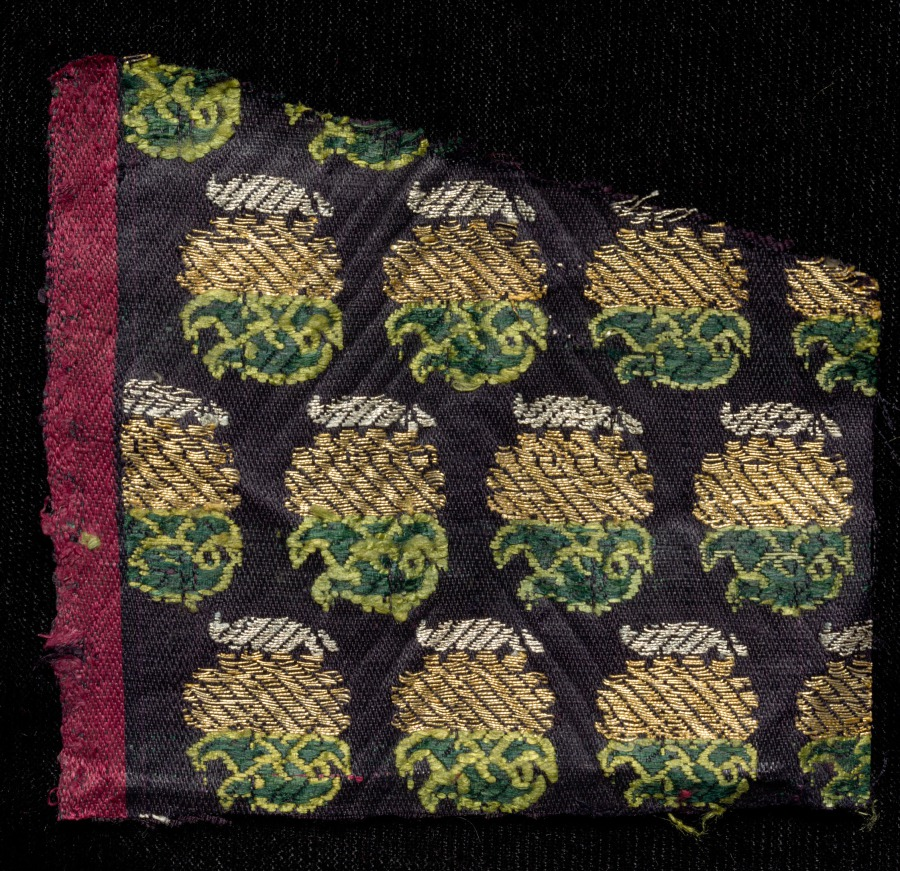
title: Fragment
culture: India, 19th century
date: 1800s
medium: brocade; silk, gold and silver threads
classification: Textile